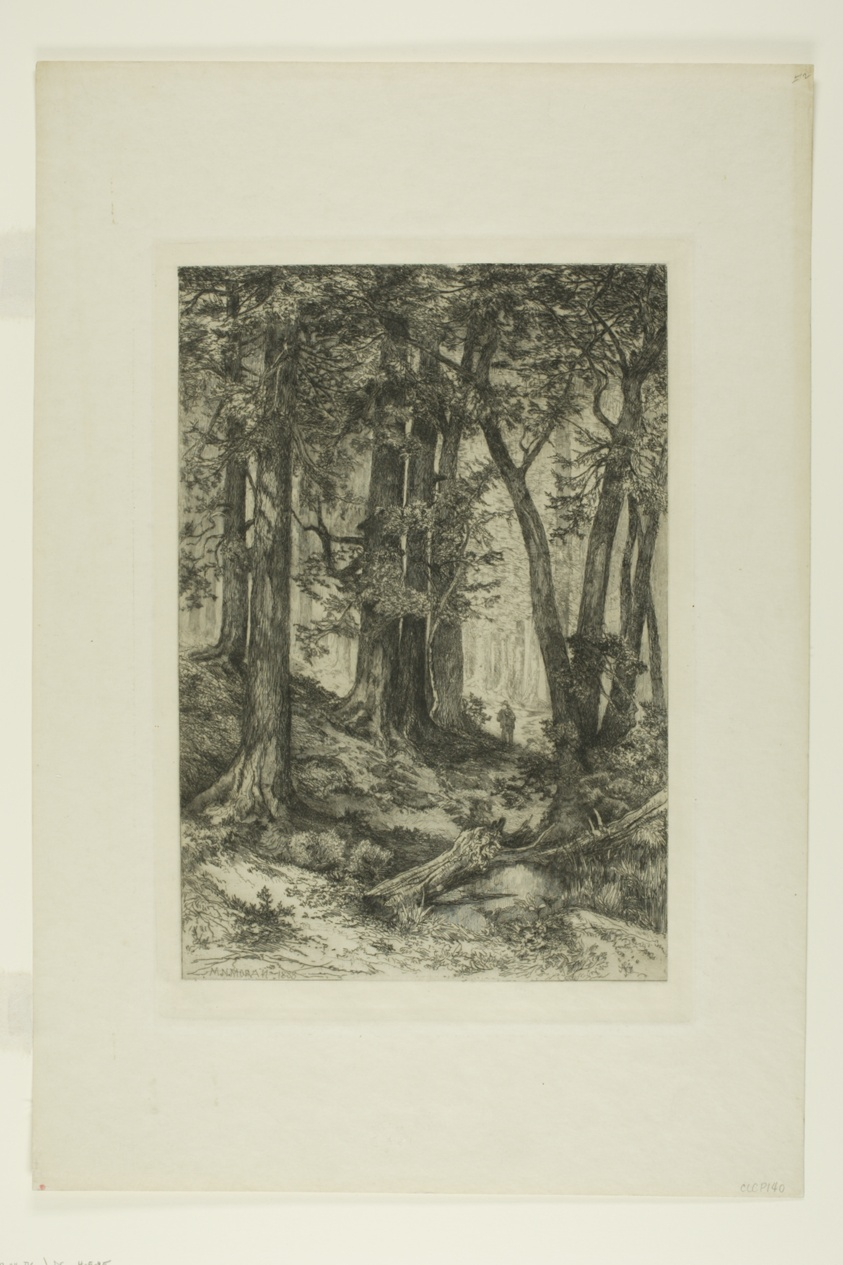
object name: Print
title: A California Forest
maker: Mary Nimmo (American, 1842-1899); Thomas Moran (American, born England, 1837-1926)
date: 1888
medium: Etching and roulette on paper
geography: United States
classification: etching; print; prints and drawing